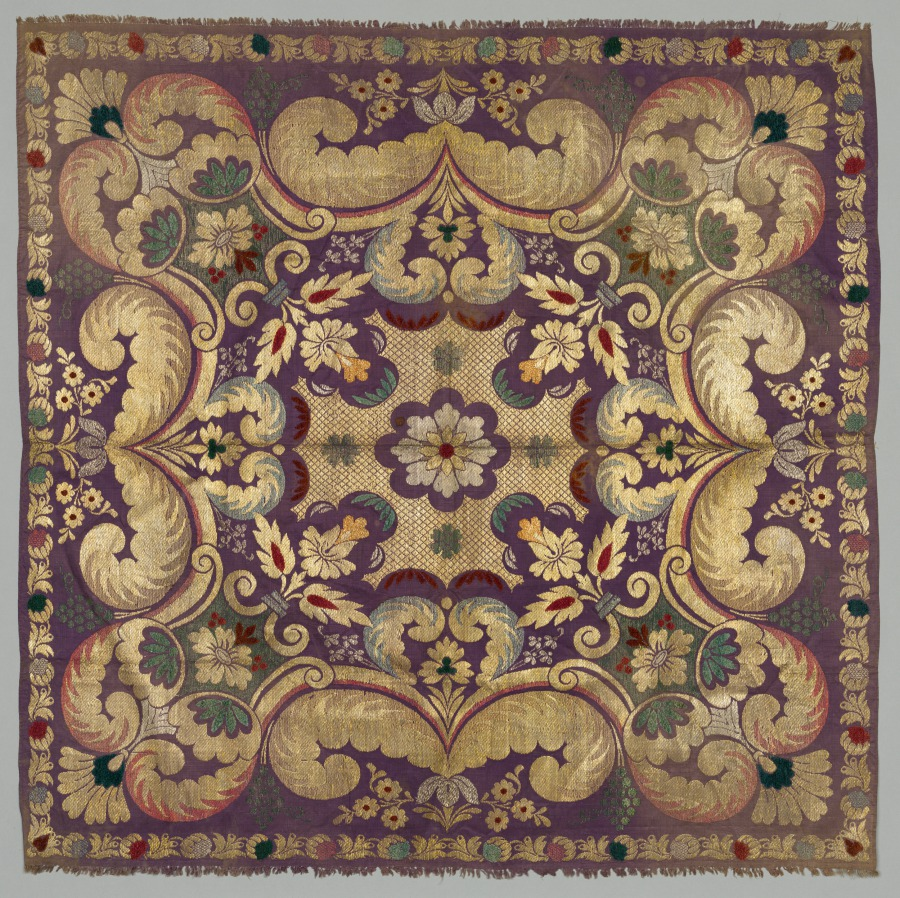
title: Square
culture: Russia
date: 1700s–1800s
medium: brocade; silk, gold and silver threads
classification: Textile